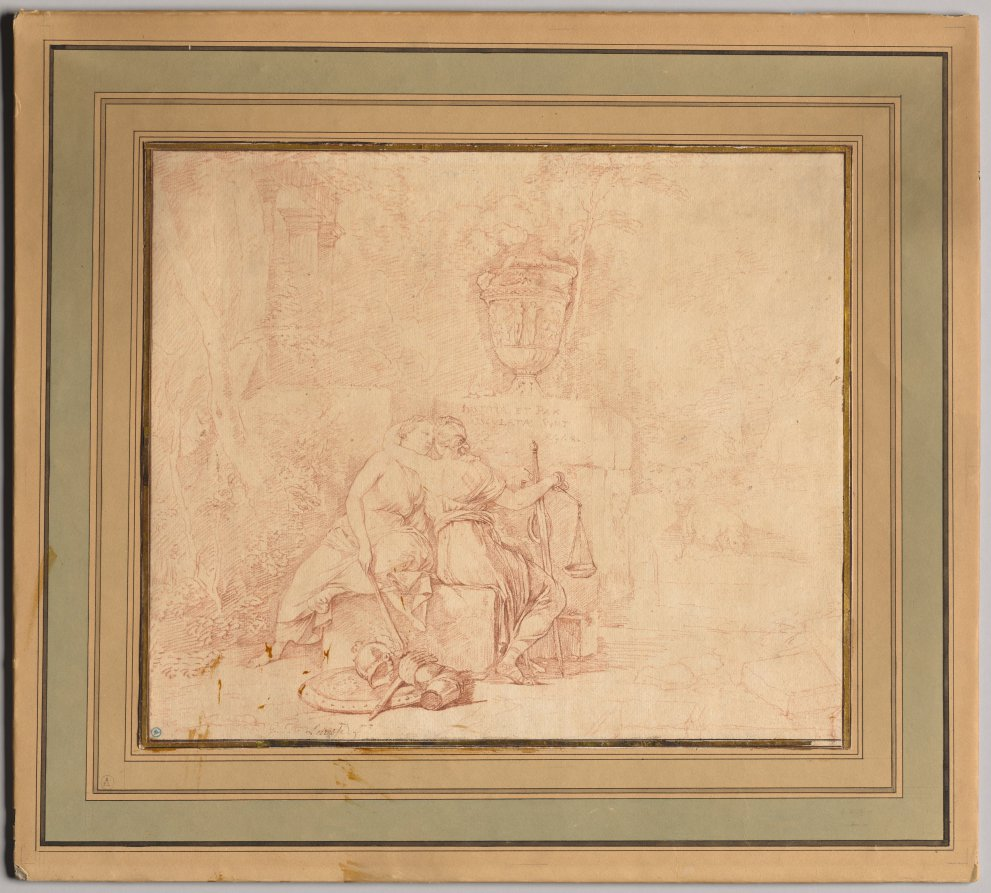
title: The Kiss of Peace and Justice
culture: Netherlands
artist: Gerard de Lairesse (Flemish, 1641–1711)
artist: after Laurent de La Hyre (French, 1606–1656)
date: after 1654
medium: red chalk; double framing lines in black ink over graphite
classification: Drawing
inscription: signed, lower left, in brown ink: G.... De Leiresse. f ; VERSO OF QUINTERNARY SUPPORT, along left edge, in white chalk: [illegible] 213/3[illegible]